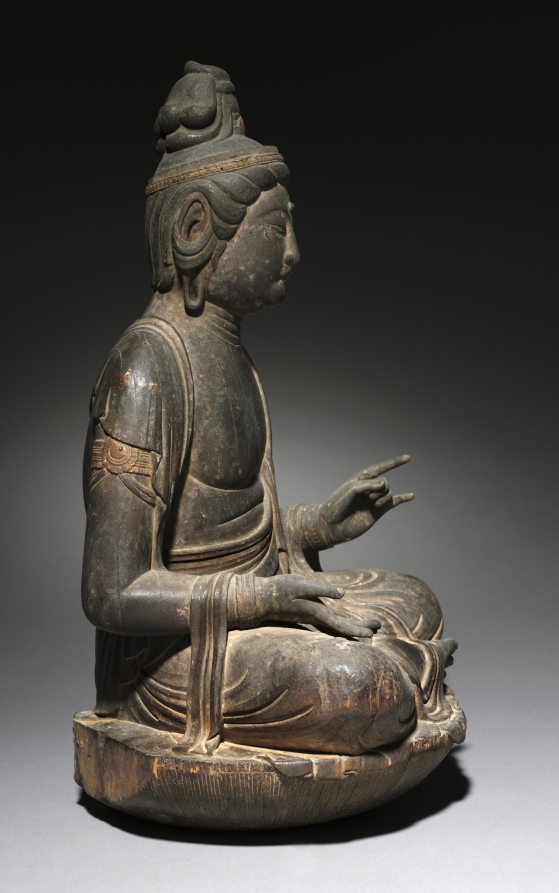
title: Sun Bodhisattva (Nikkō Bosatsu)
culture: Japan, Heian period (794–1185)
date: c. 800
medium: Japanese nutmeg-yew wood with traces of color and gold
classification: Sculpture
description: Bodhisattvas are beings who have attained enlightenment but delay entry into Buddhahood until they have fulfilled their varied vows to aid others along the path to enlightenment. The flowing robes and curving posture of this figure were inspired by Chinese Buddhist sculpture. However, the interplay of the wood grain in this single block of yew with the artist’s subtle carving is a Japanese innovation. Originally paired with the Moon Bodhisattva (Gekkō Bosatsu), this figure likely flanked a sculpture of the Medicine Master Buddha (Yakushi Nyorai).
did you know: Japanese nutmeg-yew, or kaya, was used as a replacement for the unobtainable sandalwood of which small Buddhist sculptures imported from China were made.